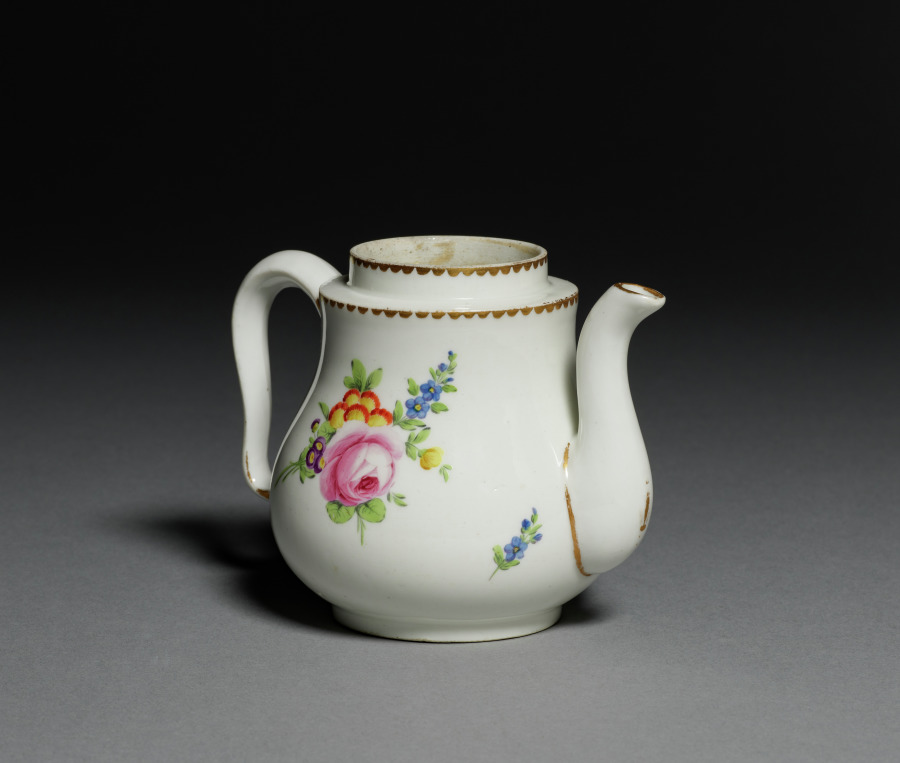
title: Teapot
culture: France, Paris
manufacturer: Rue Thiroux Factory (French)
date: c. 1780s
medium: hard-paste porcelain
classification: Ceramic